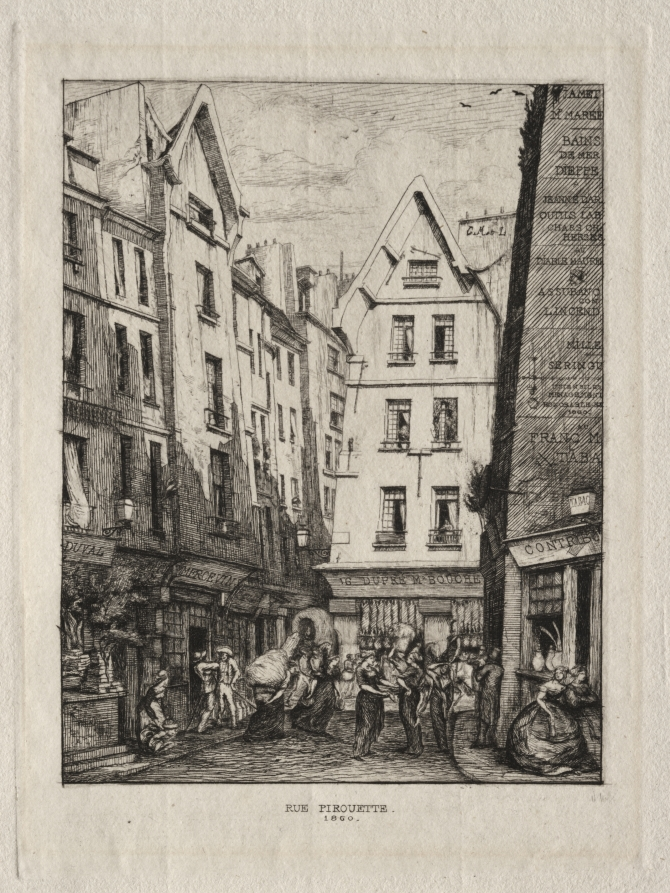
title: Pirouette Street, near the Markets, Paris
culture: France, 19th century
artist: Charles Meryon (French, 1821–1868)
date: 1860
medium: etching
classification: Print